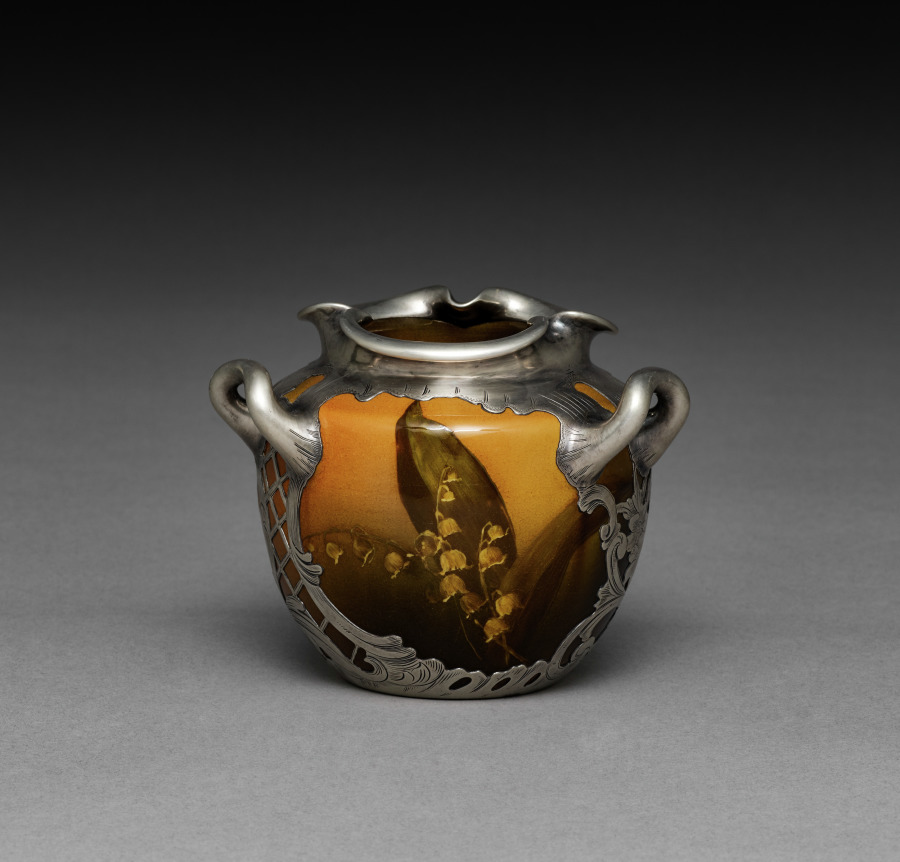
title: Vase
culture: America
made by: Rookwood Pottery Company (American, established 1880)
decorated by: Emma D. Foertmeyer (American)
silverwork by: Gorham Manufacturing Company (America, est. 1831)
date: 1893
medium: earthenware with silver overlay and three silver handles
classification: Ceramic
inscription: Stamped on rim of base: "Gorham MKG. CO."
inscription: Engraved on rime of base: "R. 1531".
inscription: Scratched underside: unidentified lines and sun type image.